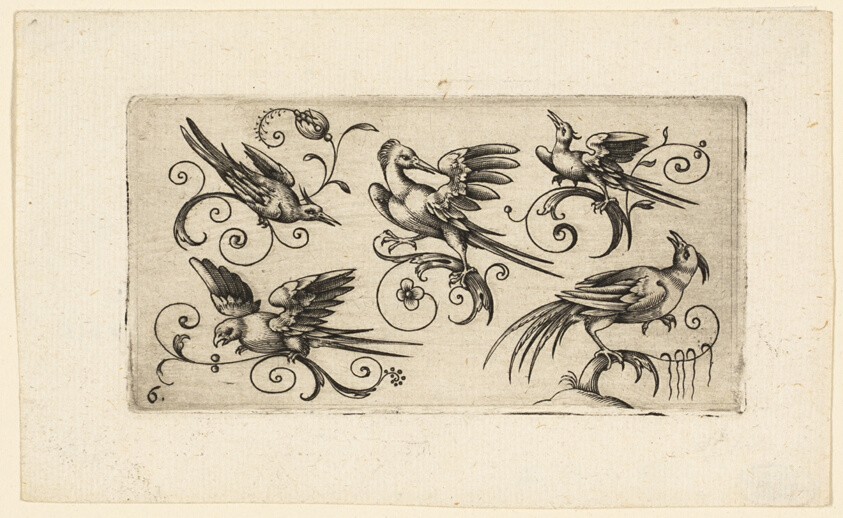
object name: Print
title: Ornament Panels with Birds: Plate 6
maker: Adrian Muntink (Dutch, active 1597-1617)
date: 1617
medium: Engraving in black on paper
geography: Netherlands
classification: engraving; print; prints and drawing